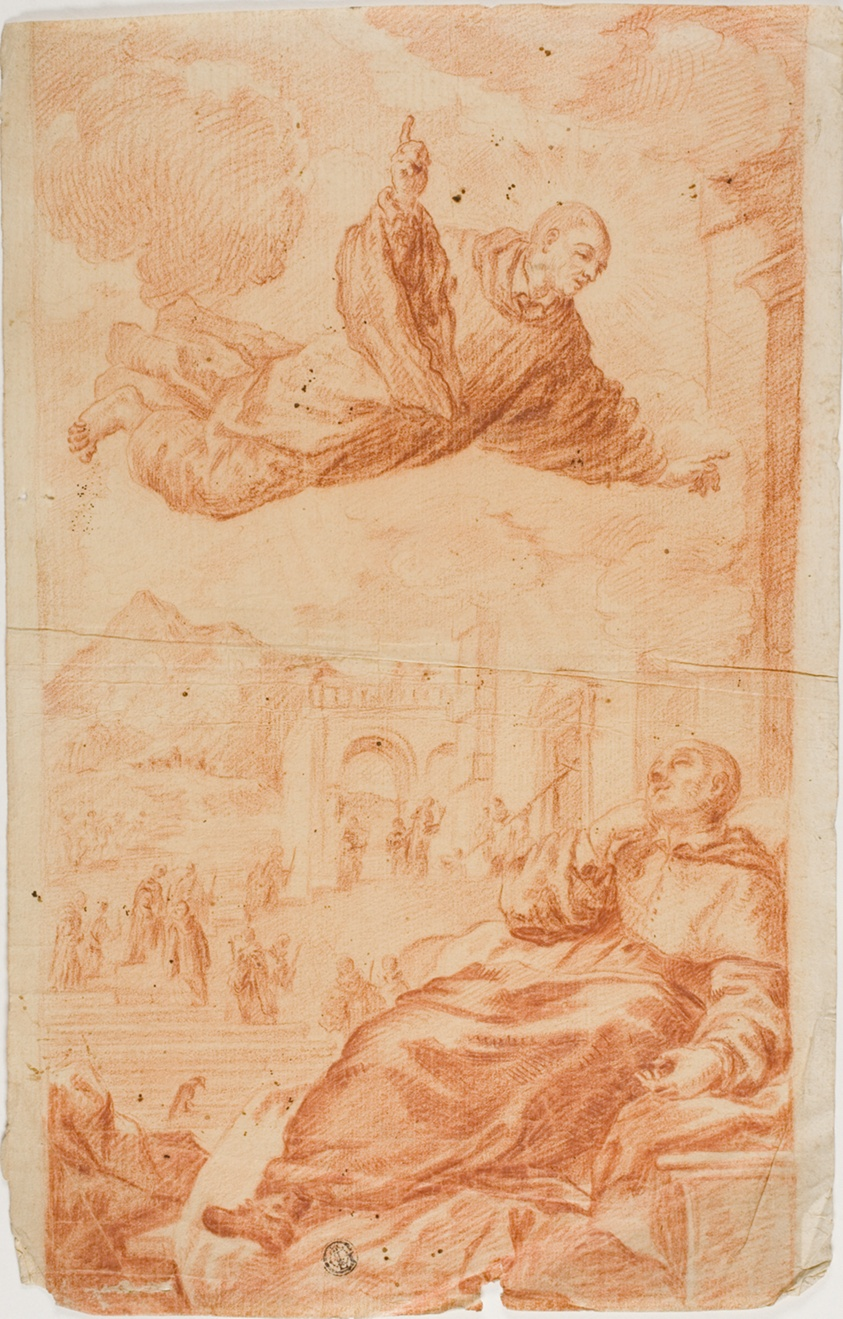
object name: Drawing and Watercolor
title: Saint Appearing to Sleeping Monk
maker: Unknown Artist; Italian, 1600-1699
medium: Red chalk on tan laid paper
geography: Italy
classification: chalk; drawings (visual works); prints and drawing